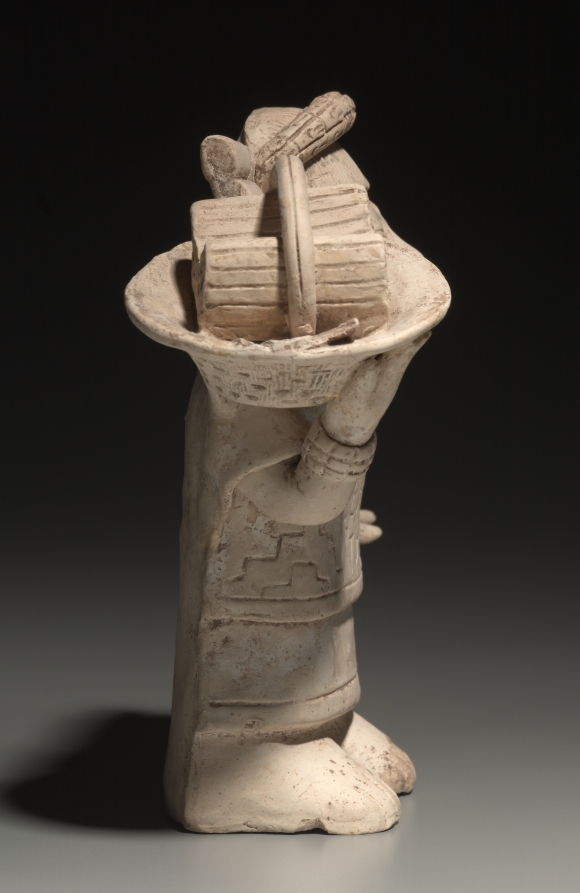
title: Standing Female with Basket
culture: Mesoamerica, Veracruz, Nopiloa style, 7th-10th century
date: 600–1000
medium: ceramic, slip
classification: Ceramic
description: This figure's delicate face features rows of raised dots on the cheeks and the edges of the ears, perhaps representing ornamental scarification; the teeth are decoratively filed into a T or tau shape that may have had symbolic import. On her shoulder she carries a basket or bowl filled with a yet-to-be-identified bundle, perhaps marshy bulrushes. The headdress ties have been lost from one side of the head.